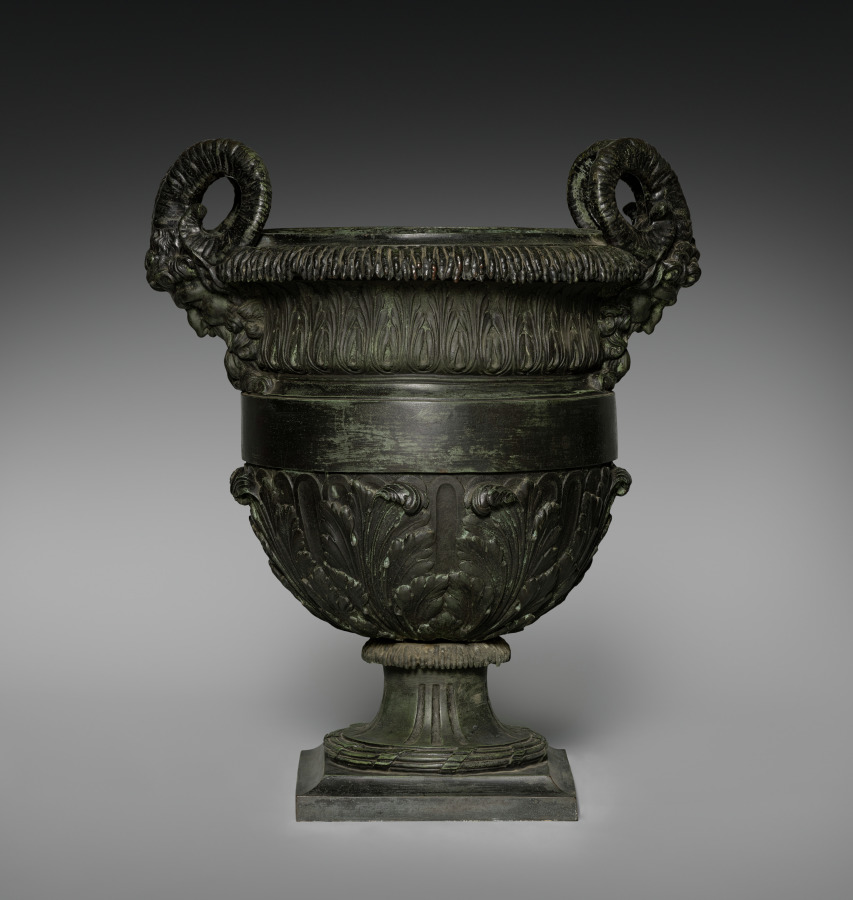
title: Urn with Satyr Heads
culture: France, 18th century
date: 1700s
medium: bronze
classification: Metalwork